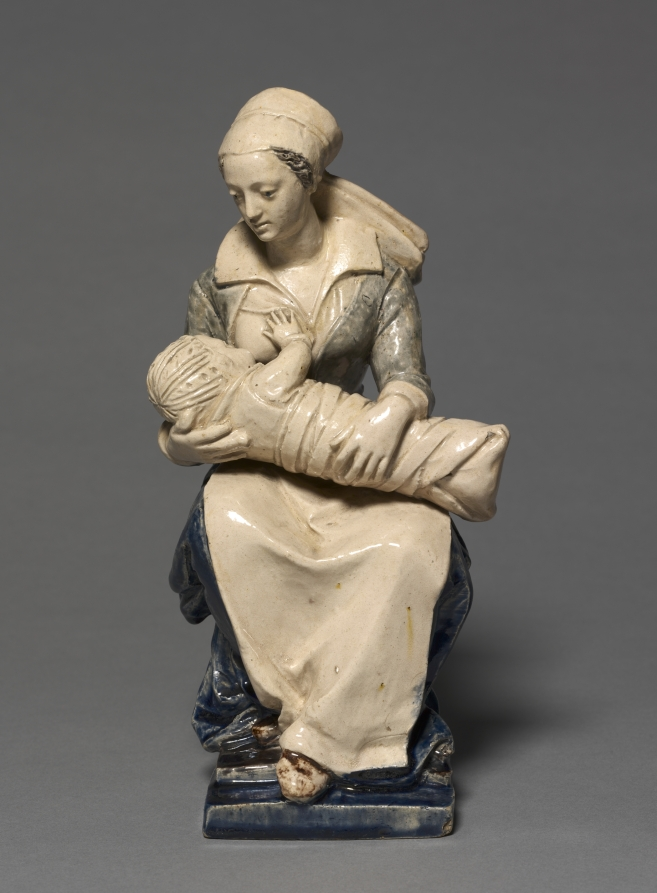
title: Figure of the Nurse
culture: France, 17th century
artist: attributed to Claude Bertélémy de Blénod (French)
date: early 1600s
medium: faience with enamel decoration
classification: Ceramic